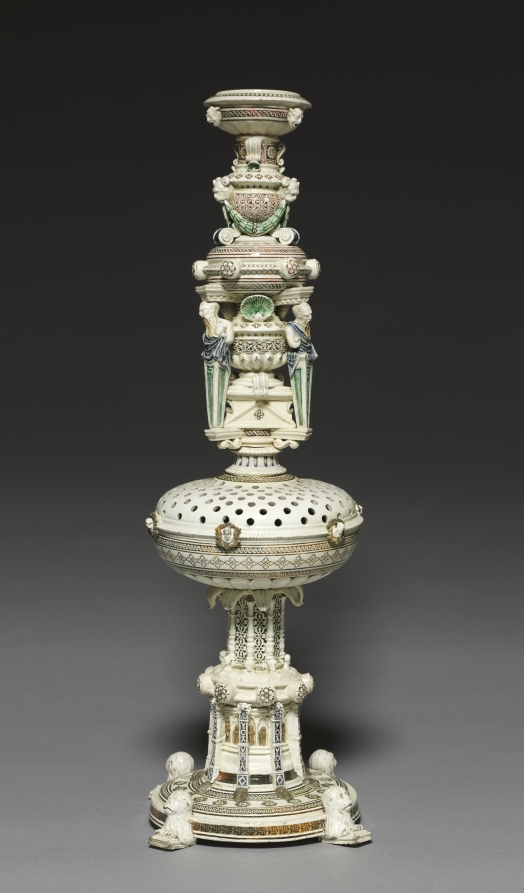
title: Flower Vase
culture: France, 16th century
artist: Saint-Porchaire (French)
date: c. 1520–1540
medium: lead-glazed white-paste earthenware, molded and inlaid slip decoration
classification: Ceramic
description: Made as two separate elements, this extremely rare example of Saint-Porchaire ware may have been conceived primarily as a tour de force of decorative art.